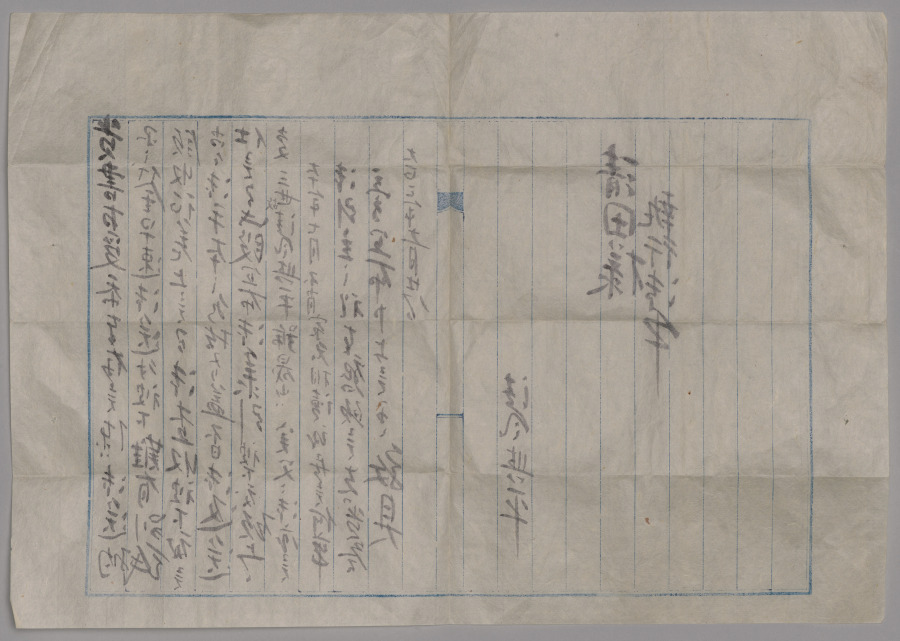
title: Water Container with Peonies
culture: Japan, Meiji period (1868–1912)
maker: Seifū Yohei III (Japanese, 1851–1914)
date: 1900–1914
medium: Porcelain with molded and carved design, green glaze, and black lacquered lid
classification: Ceramic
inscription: 清風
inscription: 帝室技芸員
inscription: 清風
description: This ceramic is an especially accomplished example of Yohei III’s combination of an allover translucent colored glaze with molded and carved designs. It features the peony as its primary motif. The water container, or mizusashi, has a green glaze, and its design takes into consideration the rounded shape and the seated position of the host and guests. It begins low on the body with a flower just beginning to open and continues with another flower a bit higher up, with its petals fully extended and beginning to open outward. It finishes with a flower in full bloom, petals and leaves unfurled and spread outward from the center, now occupying almost the entire surface. The water container once belonged to the Hosokawa family, whose go-between corresponded with Yohei IV about the piece. Yohei IV thanked them for their payment and requested that despite his father’s death in the previous year, they continue to favor the studio with their orders. The letter and its envelope, as well as an auction tag, remain with the object.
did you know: This water container may also serve as a site for cultural reckoning, as when the life cycle of a flower prized in East Asia as a symbol of wealth is displayed across a Japanese chanoyu vessel whose glaze is associated with the seats of power in China and Korea.